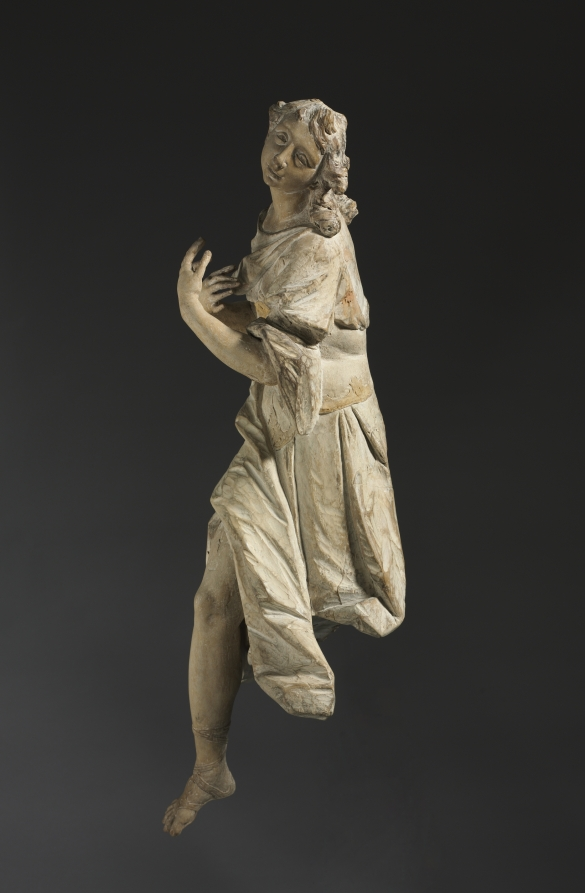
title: Kneeling Angel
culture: Germany, Munich, 18th century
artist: Ignaz Günther (German, 1725–1775)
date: c. 1760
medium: gessoed and painted wood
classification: Sculpture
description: This angel, and another now in the Philadelphia Museum of Art, were probably originally placed on either side of a tabernacle—a structure designed to hold the consecrated bread and wine of the Eucharist—on an altar in a Christian church or private chapel. The angels would originally have had wings, and the now plain surface of the sculpture would have been painted or gilded. Ignaz Günther was among the most sought-after carvers of religious sculpture in southern Germany. His virtuoso skill is particularly evident here in the angel’s pious expression and elegantly formed hands and feet.